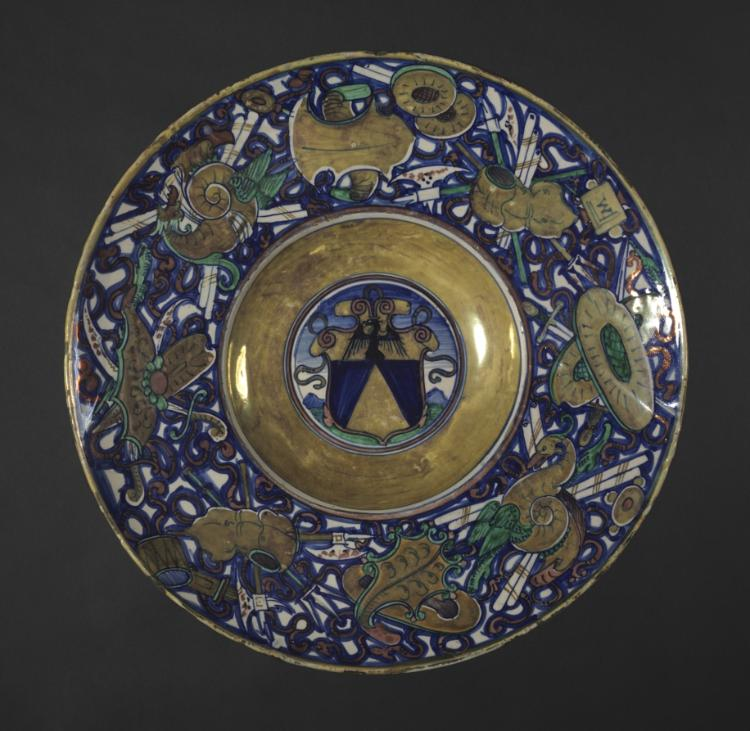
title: Charger with Arms of the Vigeri Family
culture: Italy, Urbino region, Gubbio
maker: circle of Maestro Giorgio Andreoli (Italian, 1465?–1553)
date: 1524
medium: tin-glazed earthenware with gold and red lustre (maiolica)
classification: Ceramic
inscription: written in a panel along the outer edge: "W" or "M"; written on the foot: "1524" and "Mo Go" [mark of Maestro Giorgio].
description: Italian nobles of the 1500s often expressed their wealth, social status, and sophistication by ordering large sets of maiolica that sometimes carried their coats of arms or even likenesses, usually in profile similar to portrait paintings of the period. Reserved for use at festival events such as a wedding or commissioned to mark a special occasion or an important visit, elaborately decorated utilitarian vessels in maiolica were prized as works of art by their owners and displayed as such in their residences.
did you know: During the Renaissance, the powerful Vigeri family of Savona, a seaport in northwestern Italy, included numerous cardinals and bishops of the Roman Catholic Church.